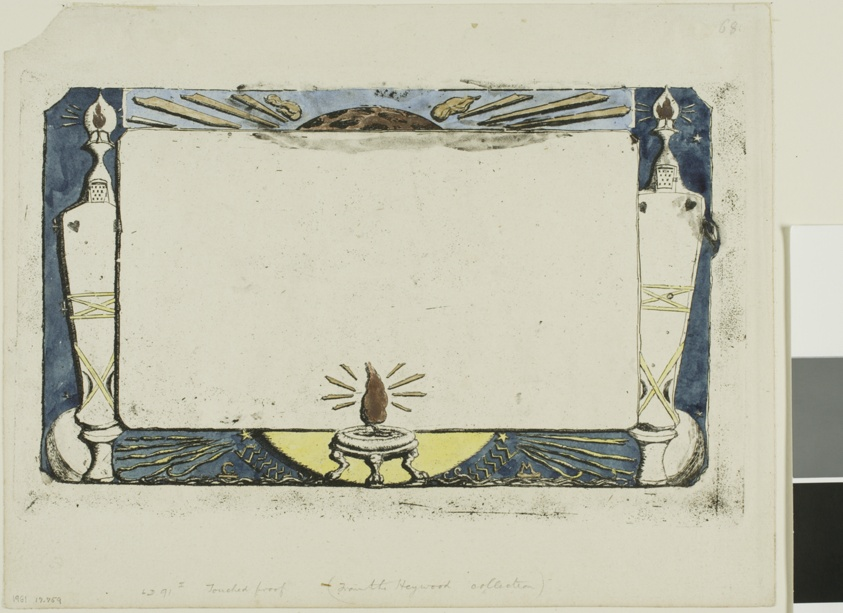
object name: Print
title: Lunar Law, No. 1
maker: Charles Meryon (French, 1821-1868)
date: 1856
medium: Etching with foul biting, hand-colored with watercolor, on ivory laid paper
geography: France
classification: etching; print; prints and drawing